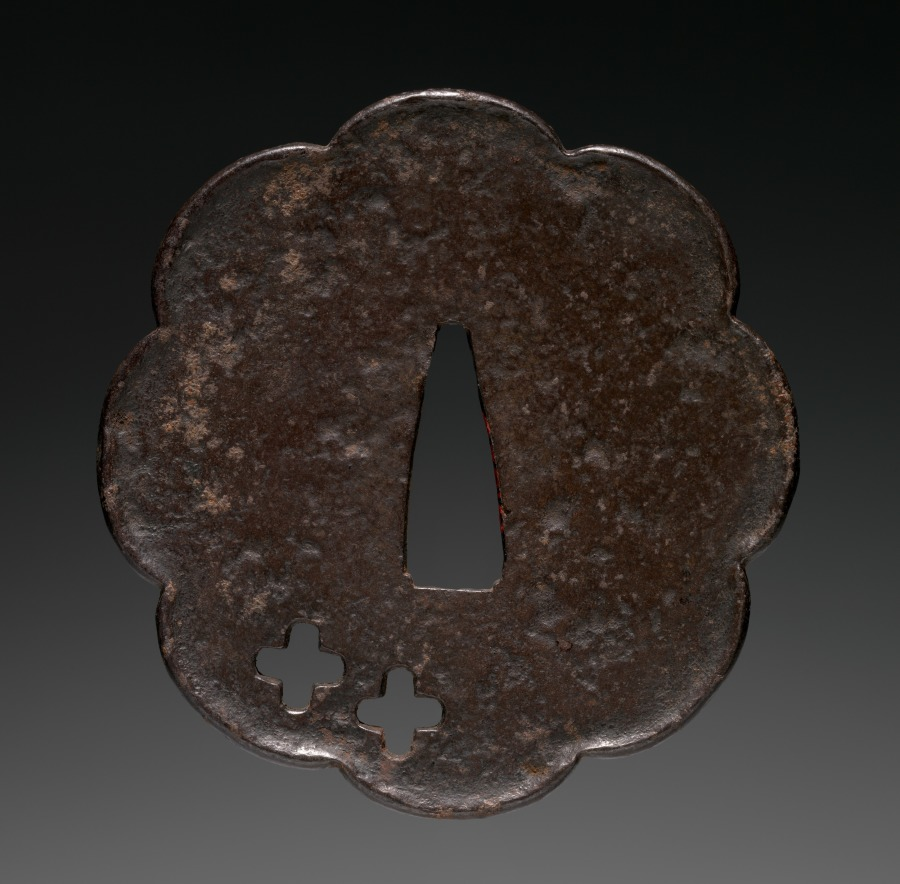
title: Sword Guard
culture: Japan, Edo period (1615–1868)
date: mid-1700s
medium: iron (Myochin type)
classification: Arms and Armor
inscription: signed "Myochin Kuninao."